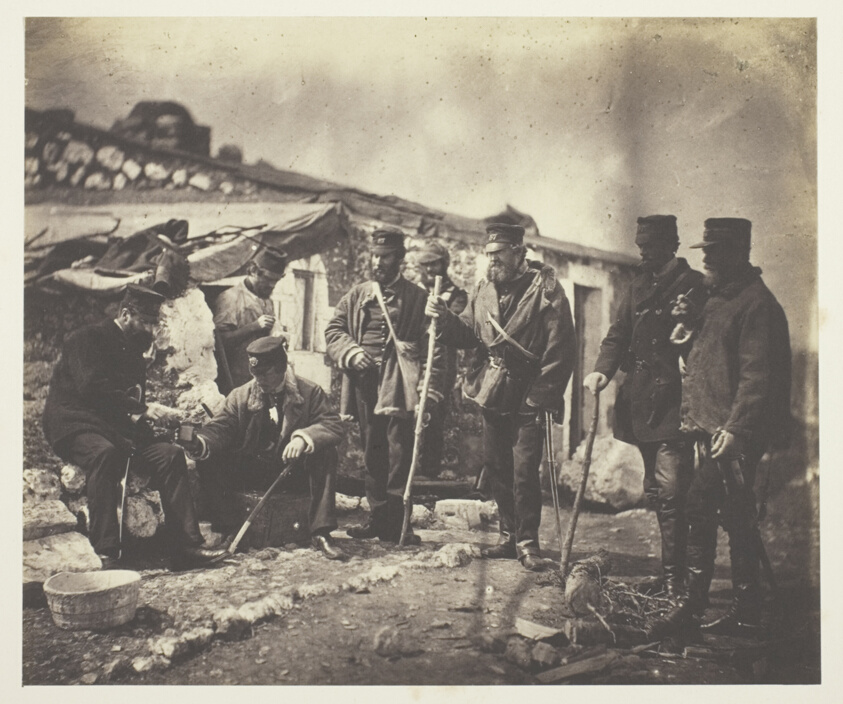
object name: Photograph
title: Lieutenant Colonel Shadforth and Officers of the 57th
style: 19th century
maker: Roger Fenton (English, 1819–1869)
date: 1855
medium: Salted paper print, plate 47 from the album "Photographs Taken in the Crimea" (1856)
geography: England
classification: salted paper print; photographic process; photography; photograph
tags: Collected by Hugh Edwards, Crimea 1856